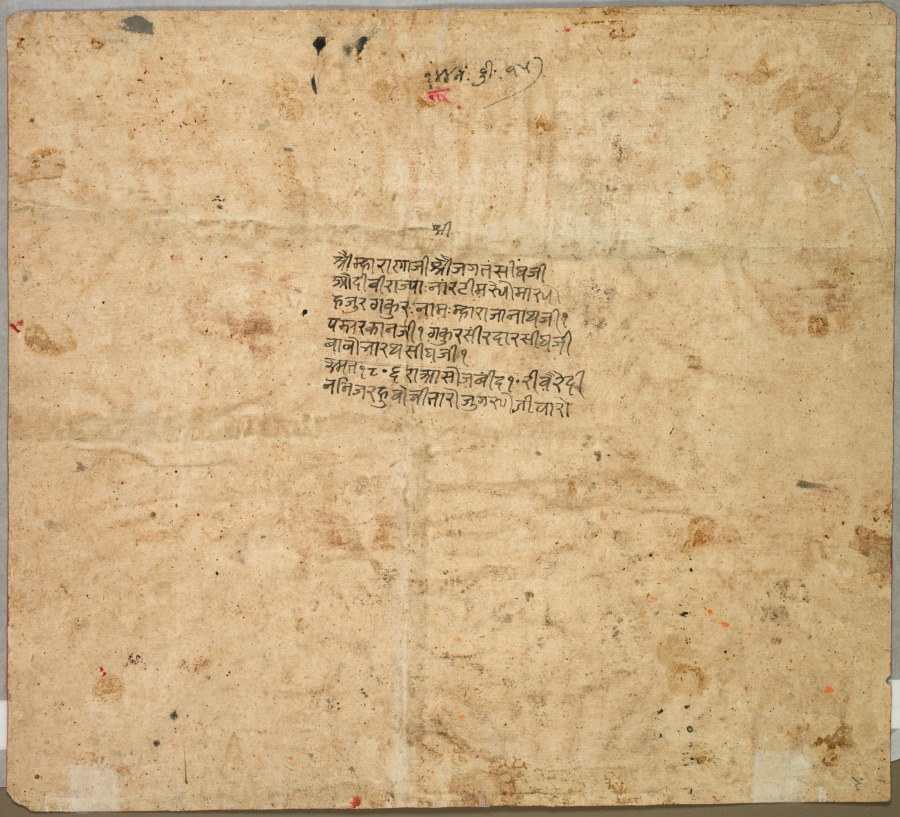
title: Maharana Jagat Singh II Hunting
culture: Northwestern India, Rajasthan, Rajput kingdom of Mewar, Udaipur, Court of Jagat Singh (reigned 1734-51)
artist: Jugarsi, son of Jiva (Indian, active mid-1700s)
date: 1747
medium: Gum tempera and gold on paper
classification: Painting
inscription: Jugarsi, son of Jiva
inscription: [?]44 115 naṁ kī: 15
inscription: śrī mhārānājī śrī jagat sīṁghjī / odī bīrājyā : nāṁr ṭī mareyo māryo / hajur thakur: nām : mhārājā nāthjī 1 / padyār kānjī 1 thakur sīrdār sīṁghjī / bābo bhārath sīghjī 1 samat 1806 rā āsoj bīd 10 rī vaire dīn / nijar huvo cītāro jugarno jīvā ro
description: One of the favorite pastimes of the Rajput nobility was hunting, a subject frequently depicted in secular painting in Rajasthan. Often much larger than other Indian paintings, hunting scenes glorified the pleasures and splendors of these stately affairs. This colorful painting depicts a royal hunt conducted by the Maharana Jagat Singh II of Udaipur. An inscription on the reverse side of the painting mentions the Maharana's name along with the hunting party's other participants, including the Maharana's brother. The hunt takes place in a detailed landscape of hills and varied vegetation. The animals (tiger, bear, wild boar, deer, stag, and antelope) are rounded up and diverted by servants (who shoot firecrackers) toward the shooting box at the center of the composition, where the royal members of the hunting party await their prey. Another group of servants with dogs approaches from the opposite direction to cut off the animals' route of escape. Some beasts are already killed or wounded, while others are trying desperately to run for their lives.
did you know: The painting is signed on the reverse by the artist—a rare occurrence in Indian painting. The name reads "Jugarsi, son of Jiva."